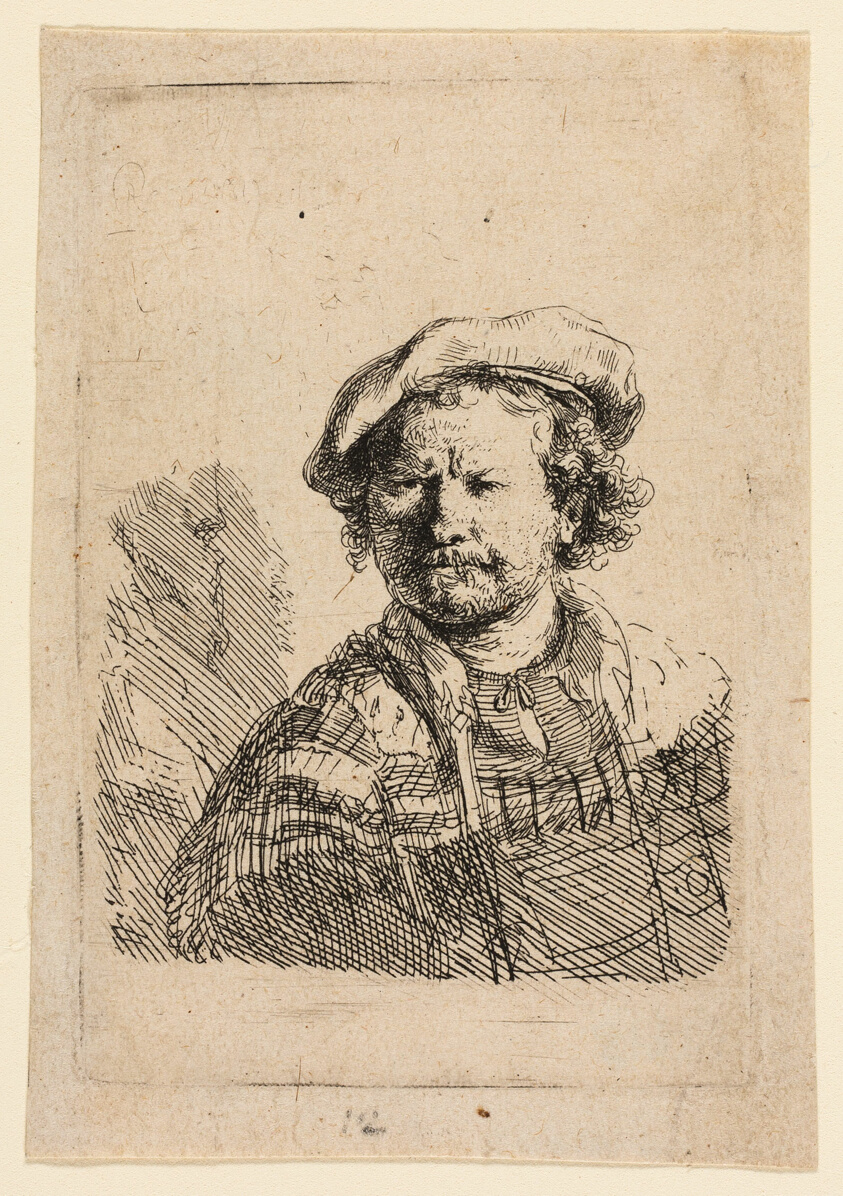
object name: Print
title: Self-Portrait in a Flat Cap and Embroidered Dress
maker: Rembrandt van Rijn (Dutch, 1606-1669)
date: c. 1642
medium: Etching on buff laid paper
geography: Holland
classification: etching; print; prints and drawing; paper